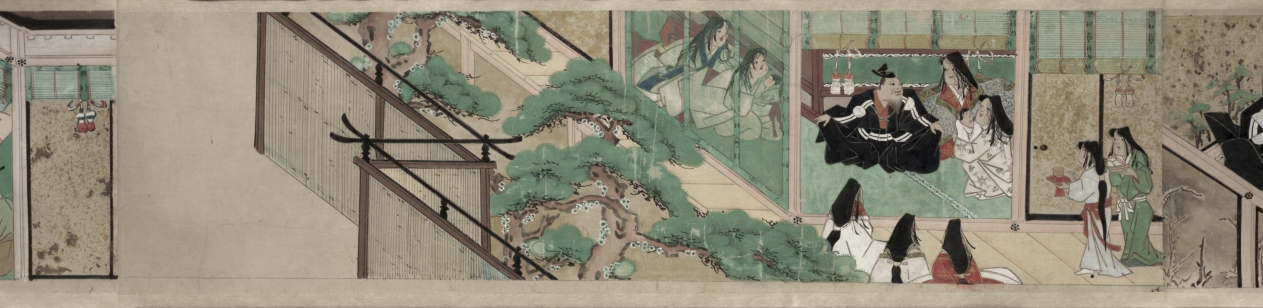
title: The Saltmaker's Story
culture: Japan, Edo period (1615–1868)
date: early 1600s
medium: One of a pair of handscrolls; ink, color, and gold on paper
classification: Painting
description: Once read and copied by girls at New Year’s celebrations and included in dowries, The Saltmaker’s Story is a rags-to-riches tale in which daughters are gifts from the gods. Despite his simple outlook, the main character progresses from humble roots as an associate at Kashima Shrine to the elite status of grandfather of the emperor through the intervention of the Kashima deity. The Saltmaker’s Story is traditionally presented in a set of three scrolls, but the text of this set has been removed by a previous owner, who remounted the illustrations as a pair. The paintings of this one take us from right to left through the first half of the tale.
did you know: This handscroll originally had texts before its paintings, but the texts were removed.